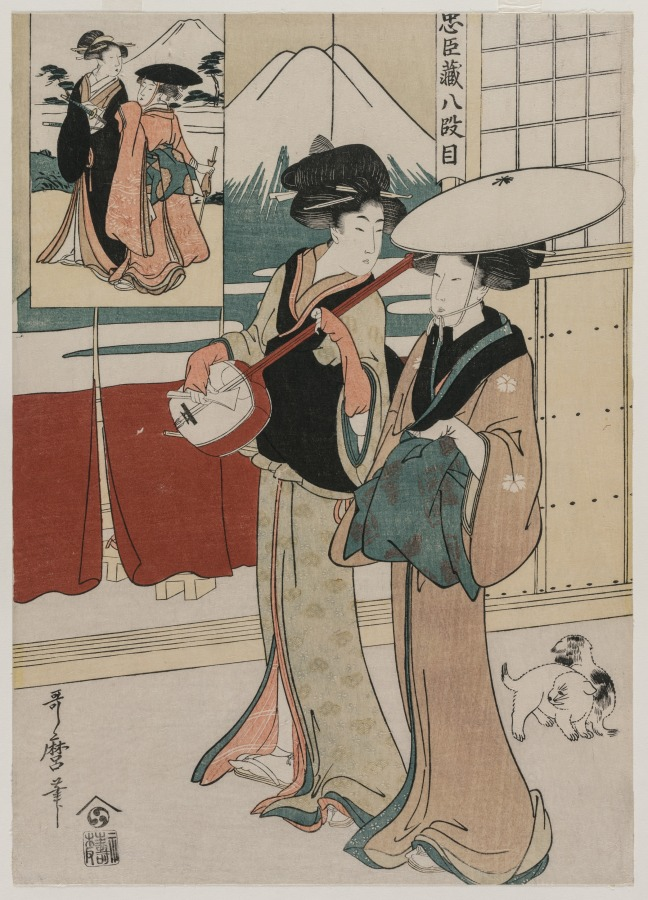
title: Chushingura: Act VIII of The Storehouse of Loyalty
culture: Japan, Edo period (1615–1868)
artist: Kitagawa Utamaro (Japanese, c. 1754–1806)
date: late 1790s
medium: color woodblock print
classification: Print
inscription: Artist's signature: Utamaro hitsu.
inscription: Publisher: Nishimuraya Yohachi (Eiju han, emblem).